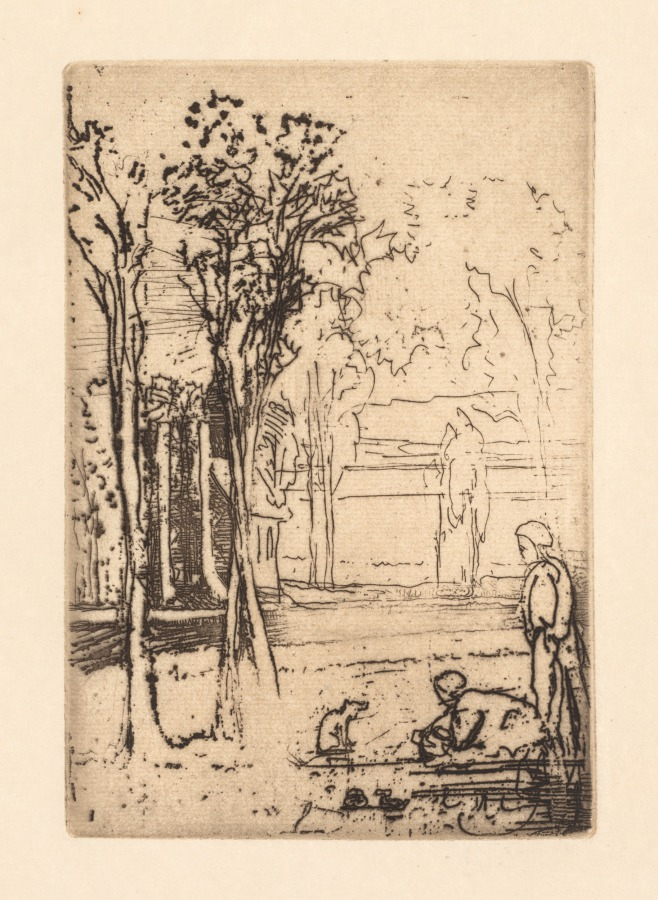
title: Three-Tree Farm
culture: Britain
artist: Francis Seymour Haden (British, 1818–1910)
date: 1879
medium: etching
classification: Print